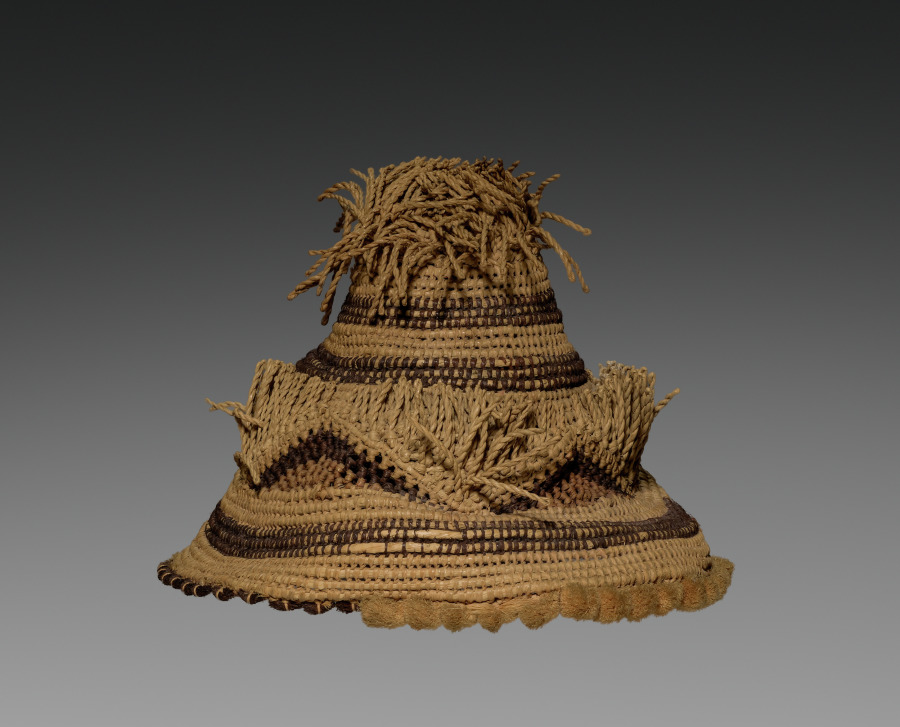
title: Hat with Pin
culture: Africa, Central Africa, Democratic Republic of the Congo, Kuba-style maker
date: early 1900s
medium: Raffia and dye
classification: Garment